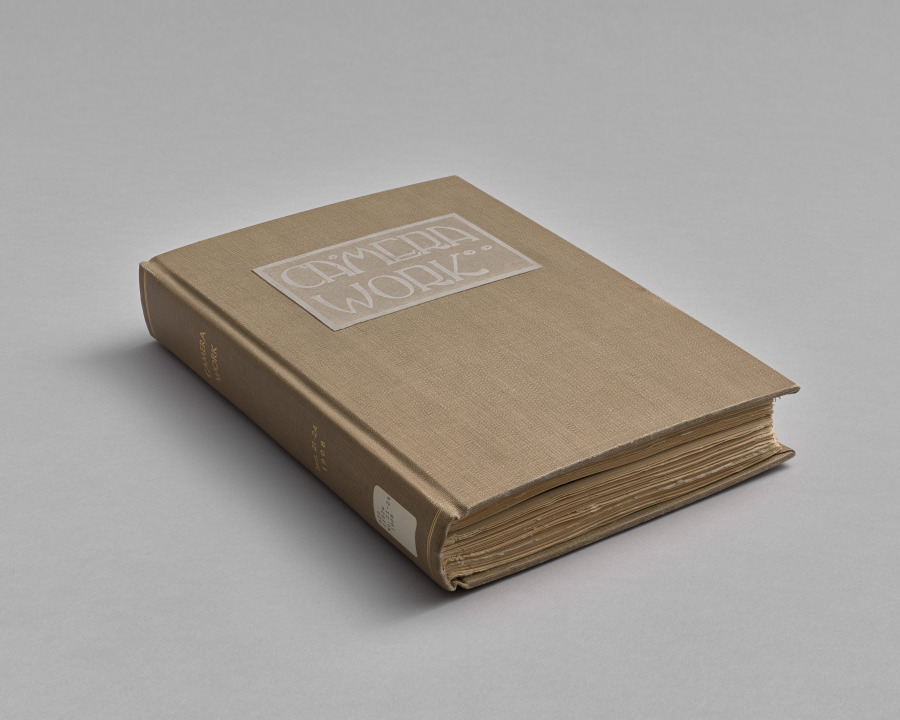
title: Camera Work: Number 23, July 1908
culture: America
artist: Clarence H. White (American, 1871–1925)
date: 1908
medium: photogravure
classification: Bound Volume